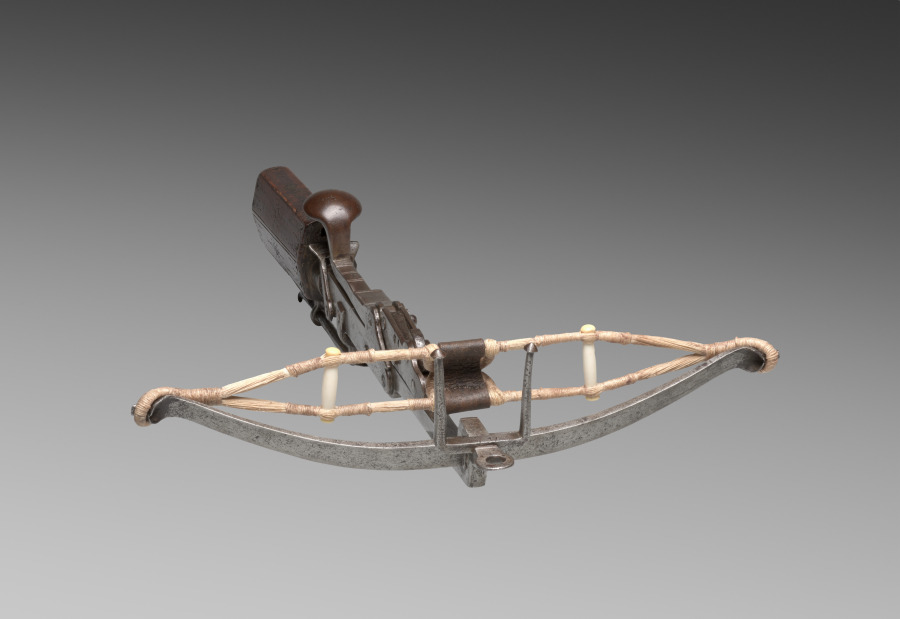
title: Pellet Crossbow for a Child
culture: Germany, early 17th Century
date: c. 1600–1650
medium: wood, bone inlay, steel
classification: Arms and Armor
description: This crossbow, made for the use of a small child, was designed to throw small stones or pellets. The bow string is an accurate replacement.